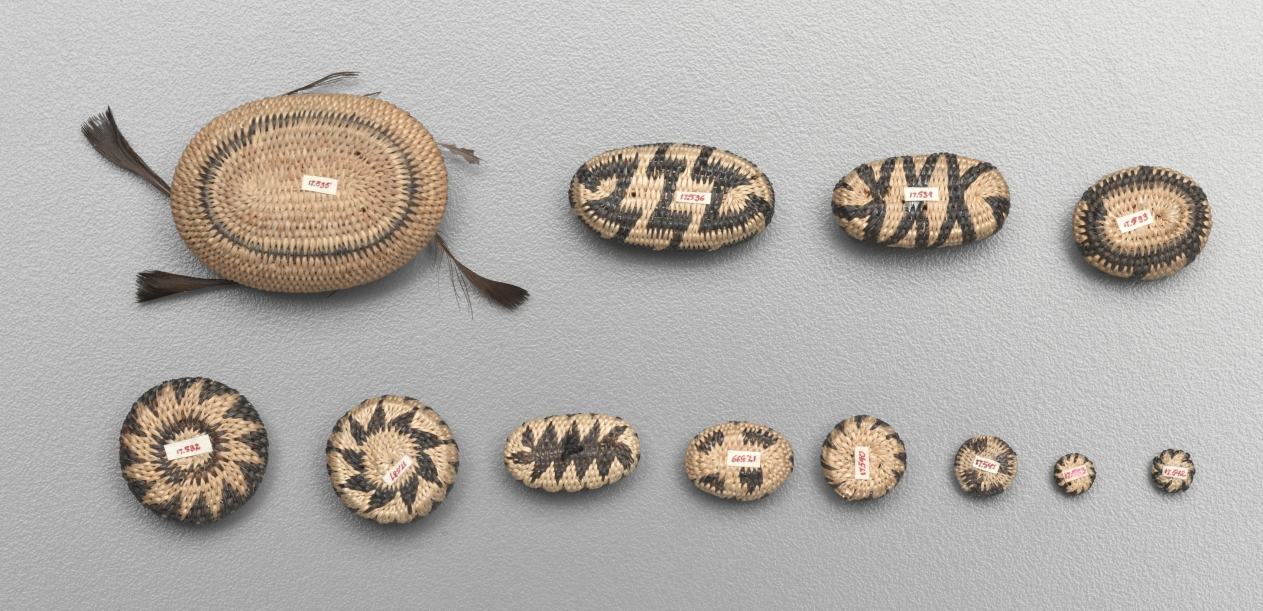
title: Miniature Round Basket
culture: California, Pomo, late 19th-early 20th century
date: late 1800s-early 1900s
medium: plant materials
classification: Basketry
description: Miniature baskets were made to demonstrate the basket-maker’s virtuoso skill, and these tiny marvels seem to be no exception -- the smallest are just a few millimeters wide but still patterned. For such fine work, dexterity was required as much for preparation of materials as for weaving.